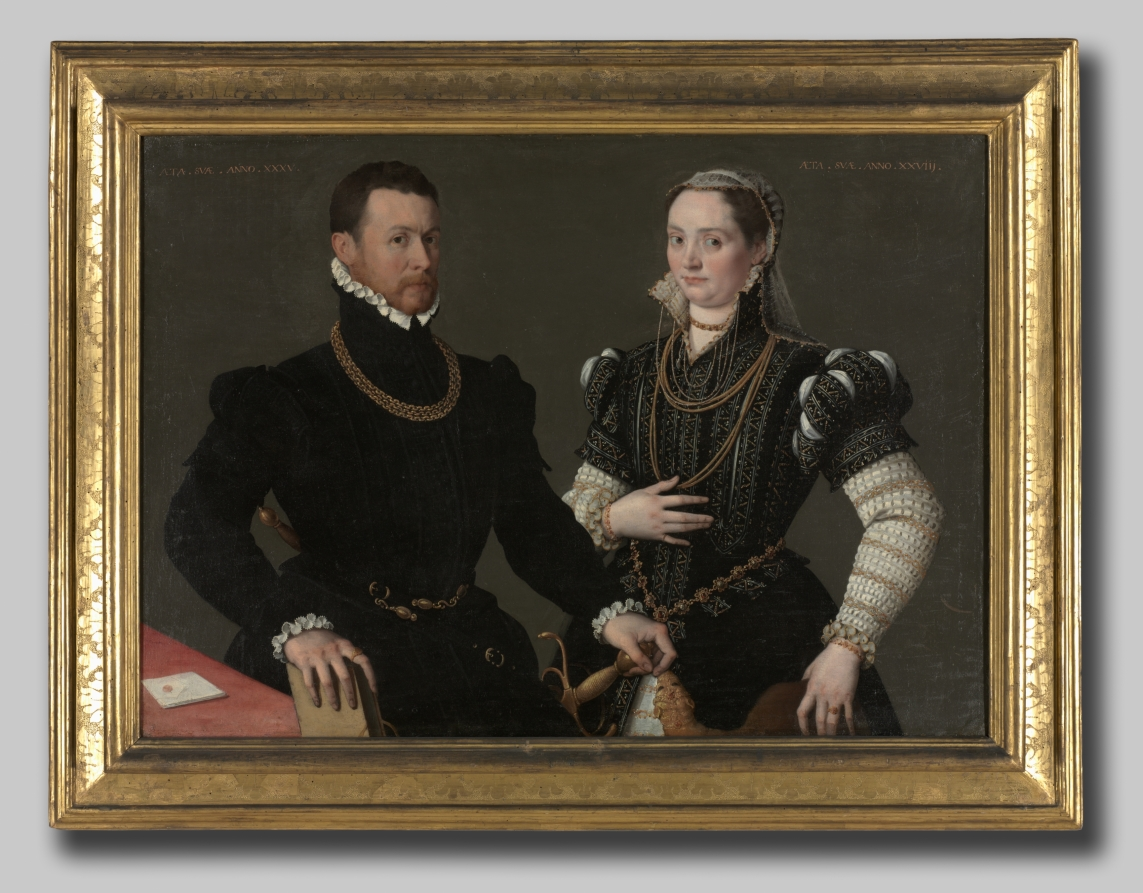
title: Portrait of a Couple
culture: Northern Italy, late 16th century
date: c. 1580–88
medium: oil on canvas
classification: Painting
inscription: inscribed upper left: AETA, SVAE, ANNO. XXXV, upper right: AETA. SVAE. ANNO. XXVIII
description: While the attribution remains hotly debated, this work exemplifies how Italian portraiture of the 1500s could articulate family alliances through marriage. The inscription gives the sitters’ ages as 35 and 28, and their elaborate jewelry, weapons, and garments, made of expensive materials, convey their elite status. The marten skin attached to the woman’s waist-its head decorated with gems-symbolized propriety. These expressions of wealth convey achievements and position rather than accurate personalities, and the figures, though lifelike, stand in awkward relationship to each other, their interaction one of alliance not love.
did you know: The bejeweled martin (weasel) was a coveted fashion accessory in Renaissance Europe.